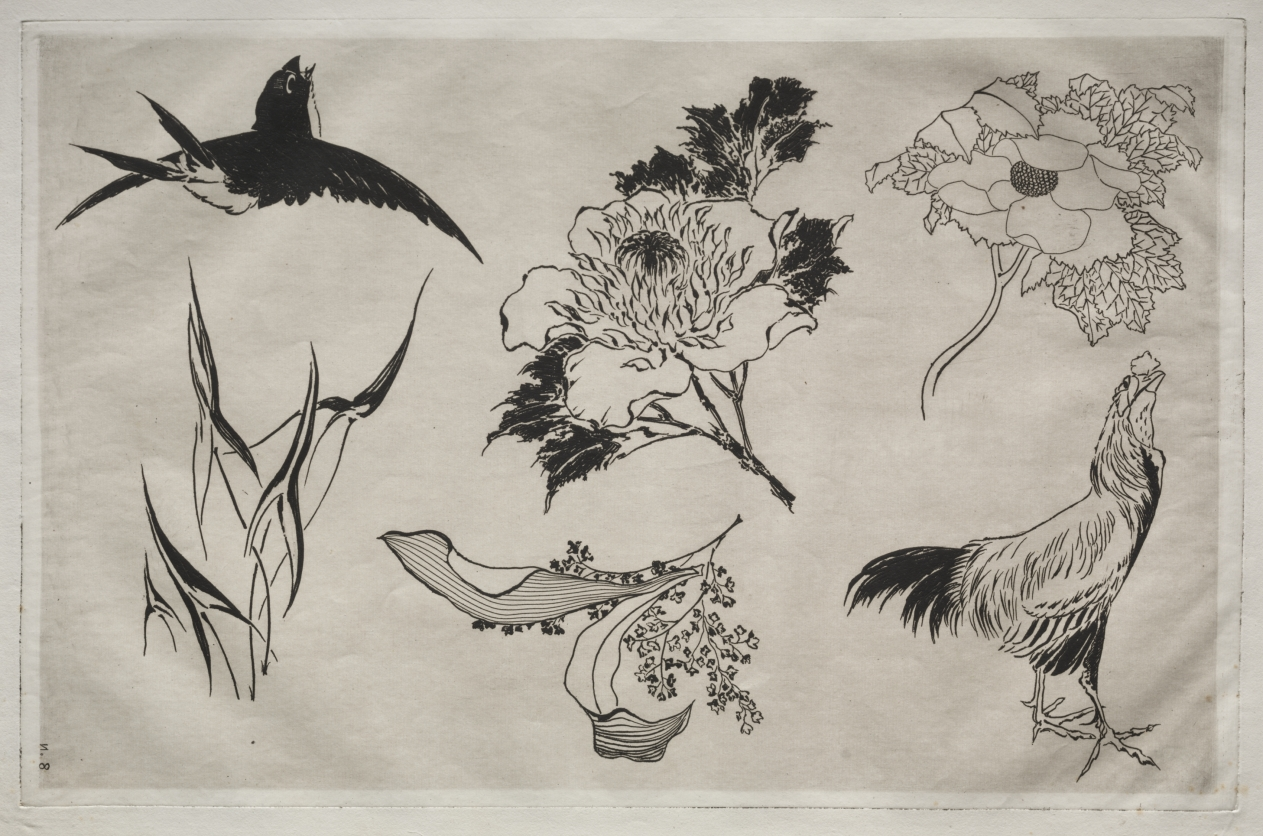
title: Dinner Service (Rousseau service): Swallow, Rooster and Flowers (no. 8)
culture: France, 19th century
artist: Félix Bracquemond (French, 1833–1914)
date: 1866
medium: etching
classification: Print